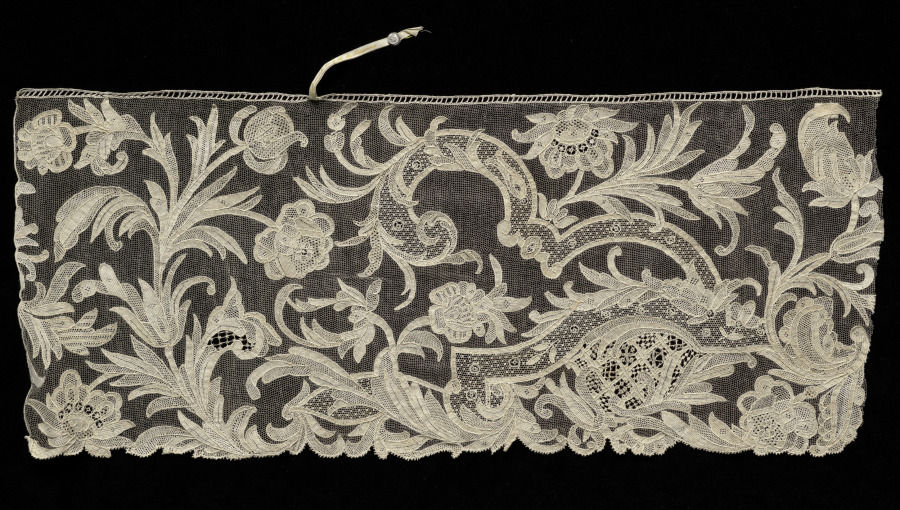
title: Lace Flounce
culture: Italy, Burano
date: 1900–1935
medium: Linen: needle lace (Burano Point)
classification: Lace